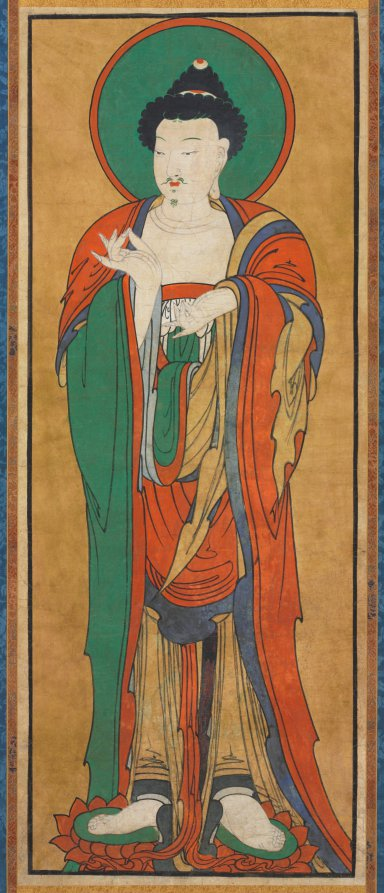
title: Tathagata Buddha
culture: Korea, Joseon dynasty (1392–1910)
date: late 1800s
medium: hanging scroll; ink and color on paper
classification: Painting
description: Buddhist paintings of the late Joseon period (from the 17th to the 19th century) have several characteristics different from their precedents. Generally, they were painted in bright mineral pigments on either thick paper or hemp. This large painting, which measures more than 2 meters tall, used to serve as a banner for outdoor Buddhist ceremonies such as the water-and-land rite (水陸會).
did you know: The term Tathāgata can be understood as both "one who has thus gone" and "one who has thus come."